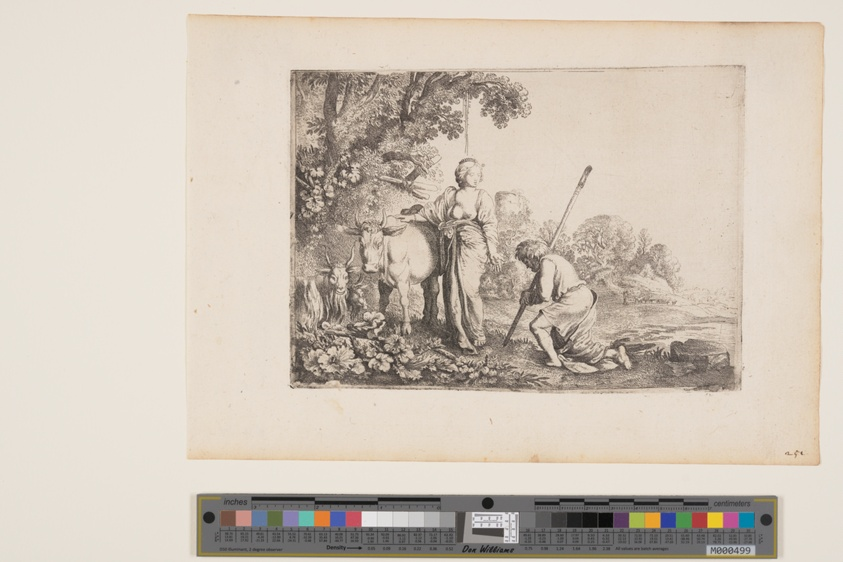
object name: Print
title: Juno Delivering Io, plate 1 from The Story of Mercury and Argus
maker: Moses van Uyttenbroeck (Dutch, c. 1595–before 1647)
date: c. 1620-26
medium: Etching on ivory laid paper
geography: Netherlands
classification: etching; paper; print; prints and drawing